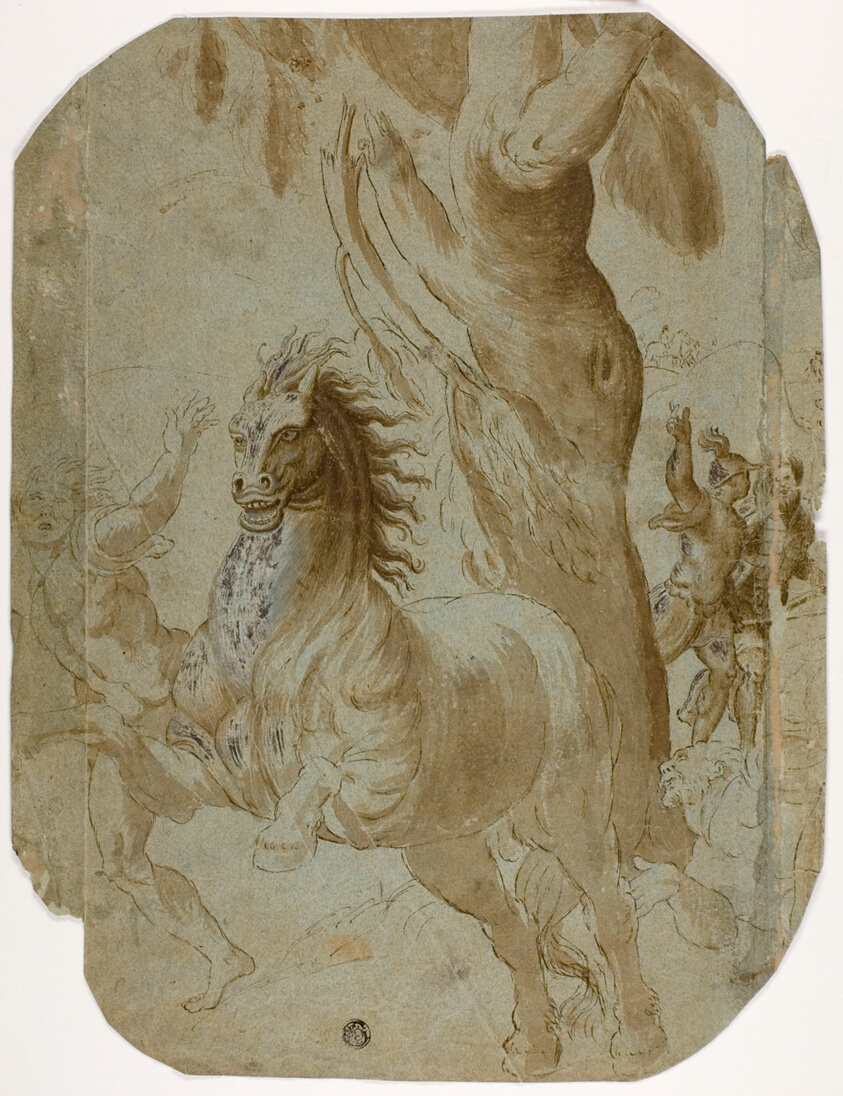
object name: Drawing and Watercolor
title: Conversion of St. Paul (recto); Man Seen from Back (verso)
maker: After Giovanni Antonio da Pordenone; Italian, c. 1483-1539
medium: Pen and brown ink, with brush and brown wash, heightened with lead white (oxidized) (recto), and black chalk and touches of red chalk (verso), on blue laid paper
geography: Italy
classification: ink with wash; drawings (visual works); prints and drawing